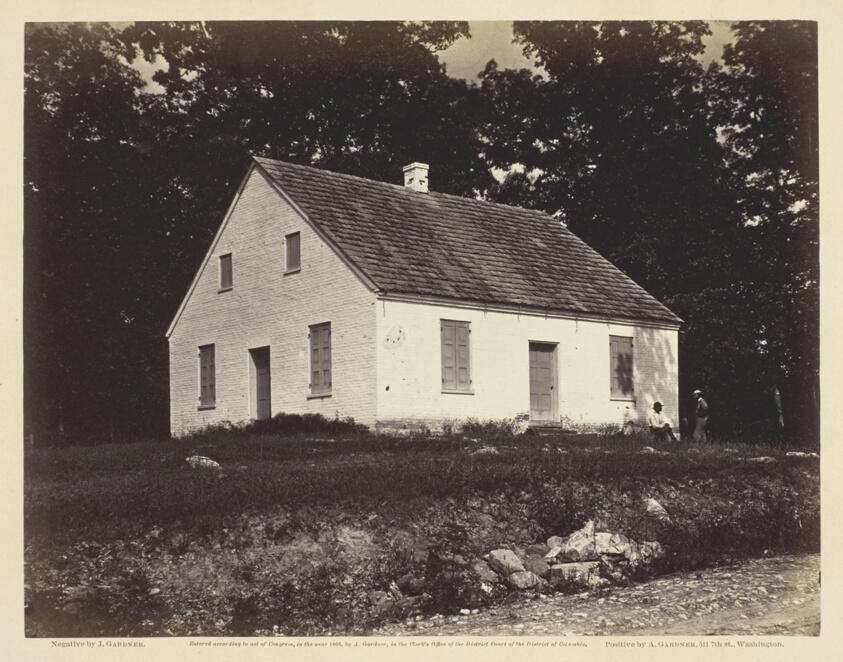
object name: Photograph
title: Dunker Church, Battle-Field of Antietam, Maryland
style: 19th century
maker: James Gardner (American, born Scotland, 1832–after 1865)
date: July 1863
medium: Albumen print, pl. 21 from the album "Gardner's Photographic Sketch Book of the War, vol. 1" (1866)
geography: United States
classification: photograph; albumen silver print; photography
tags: Collected by Hugh Edwards, Gardner's Photographic Sketch Book